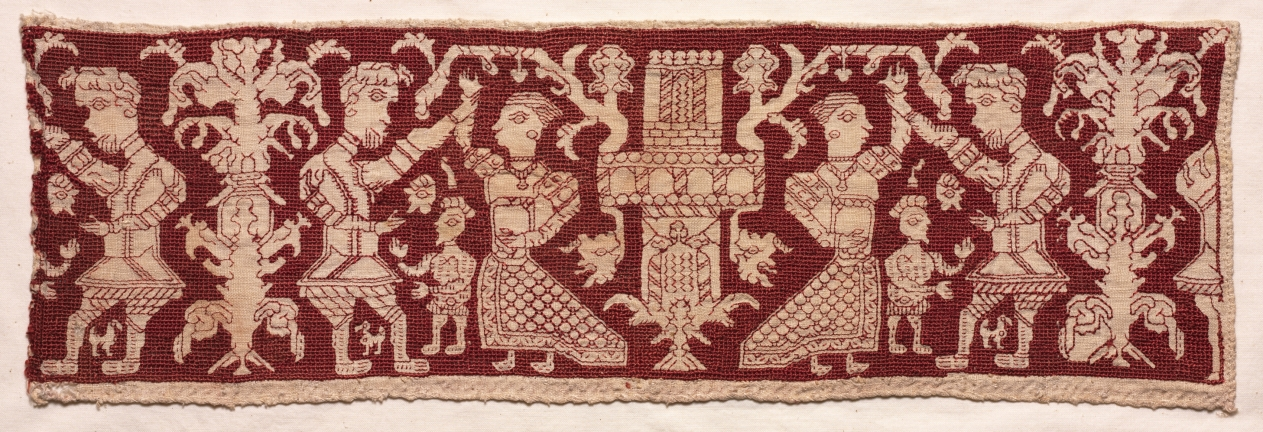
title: Embroidered Strip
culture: Italy, 16th century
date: 1500s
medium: embroidery; silk on linen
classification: Embroidery